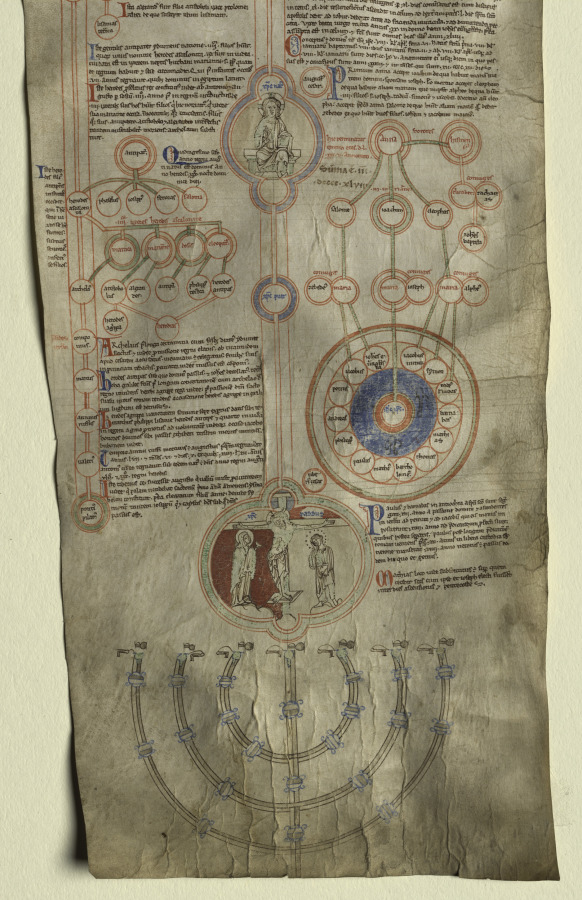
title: Peter of Poitiers's "Compendium Historiae in Genealogia Christi"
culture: England, Canterbury, 13th century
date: c. 1220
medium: ink and tempera on a vellum roll of four membranes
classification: Manuscript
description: This manuscript roll, composed of four membranes formerly stitched together in a continuous roll about nine feet long, has been divided in the middle for easier visibility and study. The text is an abridgment of biblical history focused on the descent of Christ from Adam. It was written by Peter of Poitiers (about 1130–1205), who taught theology and history in Paris and was widely copied. The present roll is an English copy of Peter's text made shortly after his death. Although manuscript rolls were hung on the walls of a classroom as instructional aids to students, some of them have value beyond their textual and historical interest because of the fine quality of their drawings, as seen here. A comparison with Canterbury manuscripts and stained glass of around 1220 is the basis for the attribution to Canterbury. Peter of Poitiers's aim in this project was to assist students prevented from mastering biblical history because of its length and because they were too poor to own books. His text on roll is the briefest possible summary of biblical history. It is arranged in six historical stages, denoting the six ages of the world, as decreed by theological tradition. The first five ages were inaugurated by Old Testament individuals: Adam, Noah, Abraham, David, and Sedecias. The birth of Christ heralded the sixth stage. Beginning at the top of the first membrane, the text consists of brief biographical entries on the ancestors of Christ (Adam, Noah, Abraham, Moses, and David) and other biblical personalities. These extend to the birth of Christ on the fourth membrane, ending with accounts of Hebrew and Roman kings and the Apostles. Each compendium shows the names of the ancestors inscribed within circles, those of direct descent placed vertically in a central column, others scattered in clusters to the right and left. The decoration of the roll consists of a series of medallions of diverse geometrical frames filled with either a figural drawing or a diagram. The style of these pen-and-ink drawings, some illuminated in tempera or tinted with wash, stems from English manuscript and glass painting attributed to the school of Canterbury Cathedral. The style of the museum's illustrations is so close to the stained glass panels made for Trinity Chapel at Canterbury (about 1220) to suggest that an artist active as a glazier in the Cathedral workshop may also have executed the manuscript. In the least, the painter of the roll manuscript was familiar with the style of the painted glass, and on this basis, a date of about 1220 seems appropriate. Additional evidence is supplied by a psalter illuminated at Canterbury shortly before 1220. The figurative scenes in this psalter were apparently illustrated by the same hand that executed the line and wash drawings in the museum's roll.